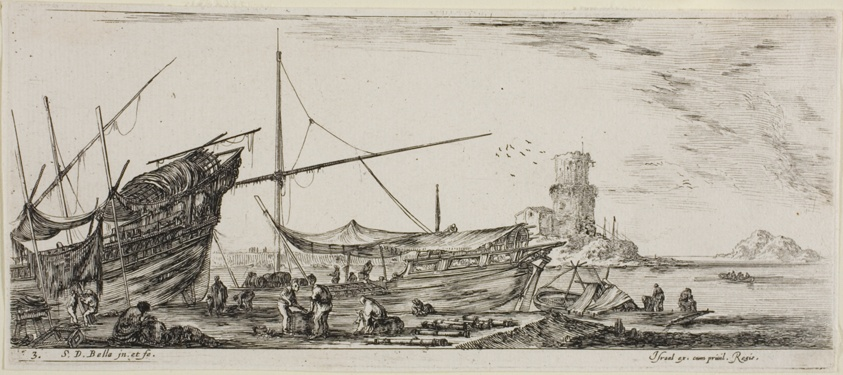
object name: Print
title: Plate Three from Various Embarkments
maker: Stefano della Bella (Italian, 1610-1664)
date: c. 1640/50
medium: Etching on ivory laid paper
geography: Italy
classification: etching; paper; print; prints and drawing